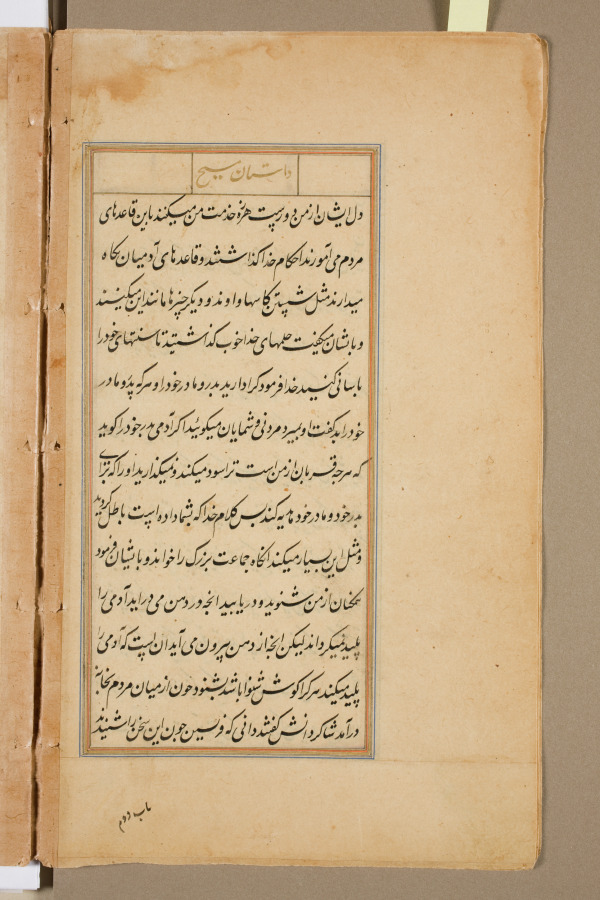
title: Text page from a Mirror of Holiness (Mir’at al-quds) of Father Jerome Xavier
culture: Mughal India, Allahabad, made for Prince Salim (1569–1627)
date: 1602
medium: Ink and gold on paper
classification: Manuscript